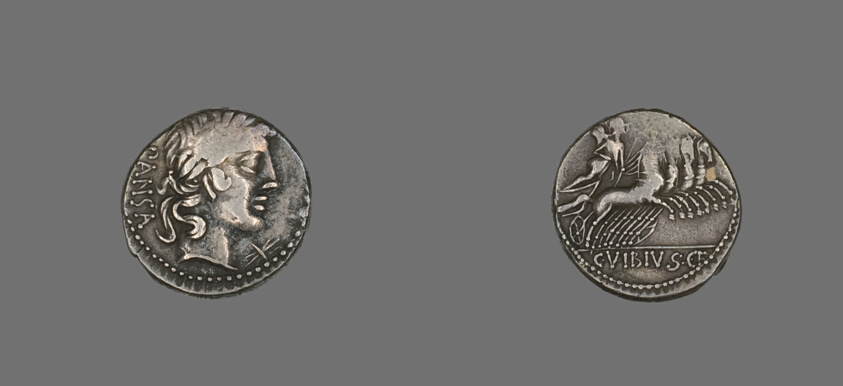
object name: Coin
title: Denarius (Coin) Depicting the God Apollo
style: republic period, ancient, roman (ancient, style or period)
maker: Roman, minted in Rome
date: 90 BCE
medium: Silver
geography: Italy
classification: coin; ancient art; struck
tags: gods (deities), Chariots